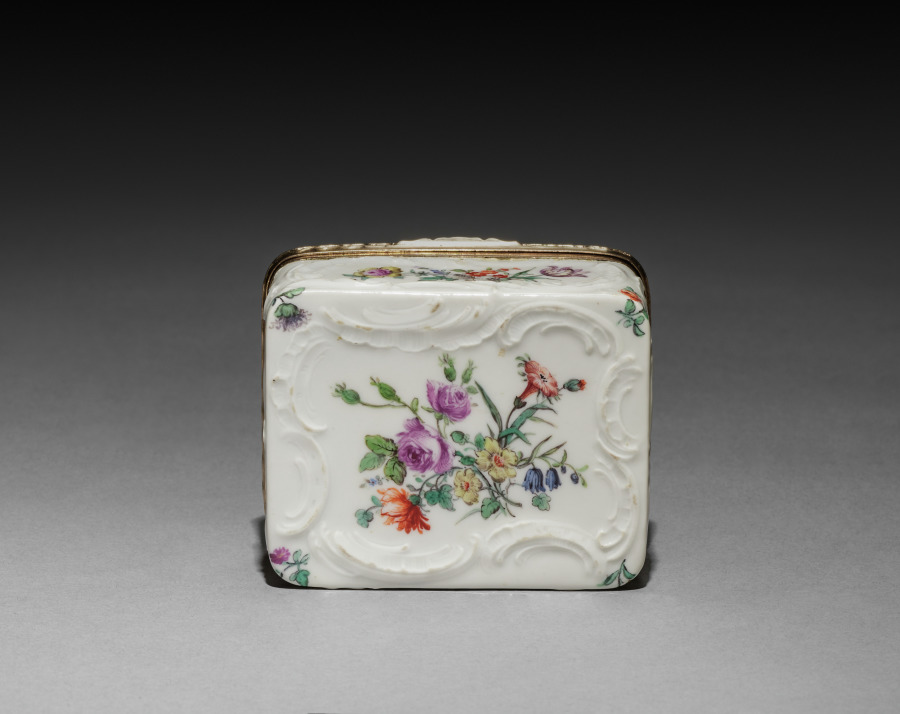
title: Box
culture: South Germany, 18th century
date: 1750–1775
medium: porcelain with silver-gilt mounts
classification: Miscellaneous